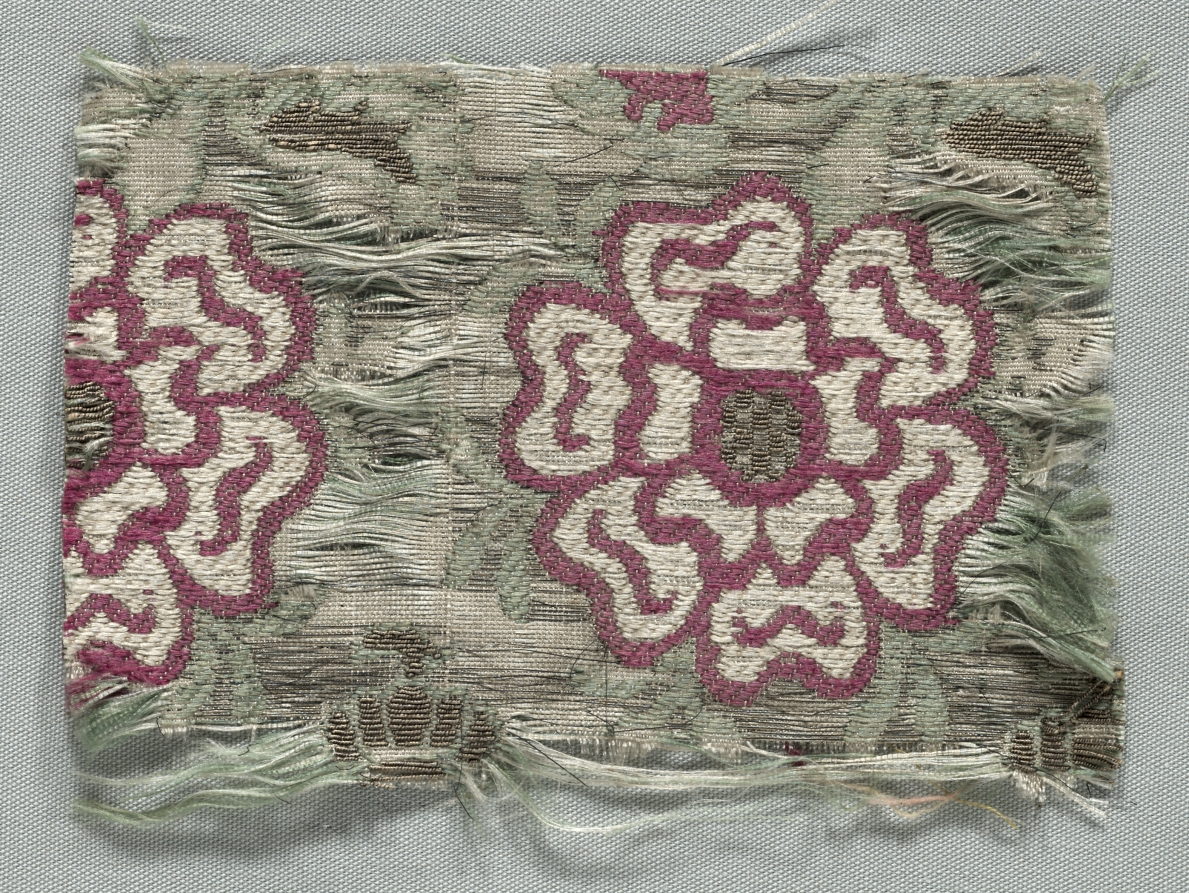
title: Brocade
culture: Italy, 16th century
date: 1500s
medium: brocade; silk and metal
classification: Textile